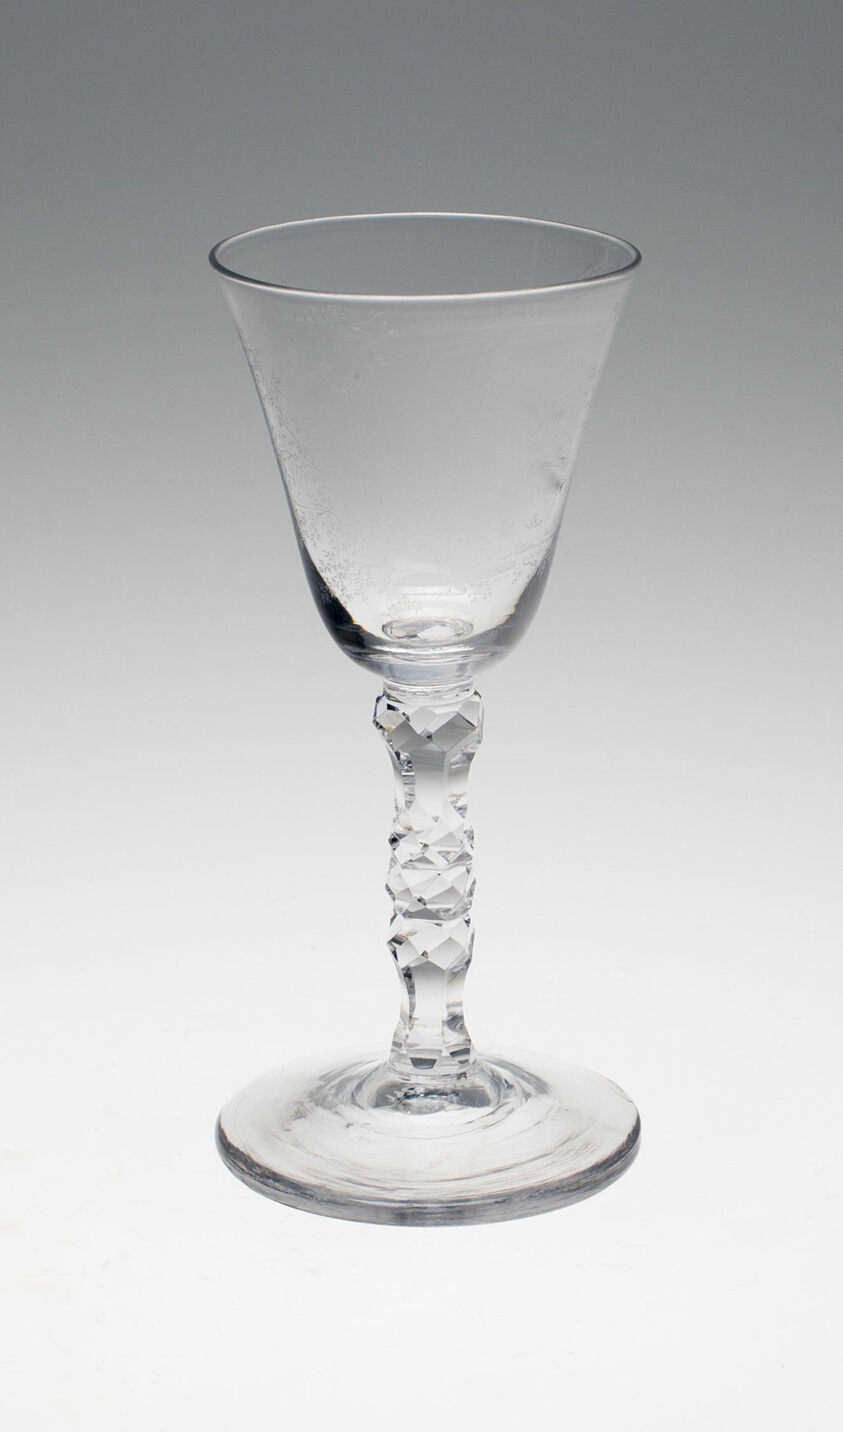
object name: Glass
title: Wine Glass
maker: England or Netherlands; Engraved: Northern Netherlands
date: c. 1760/80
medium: Glass; cut and stipple engraved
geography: England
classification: drinking vessel; glass; european decorative arts